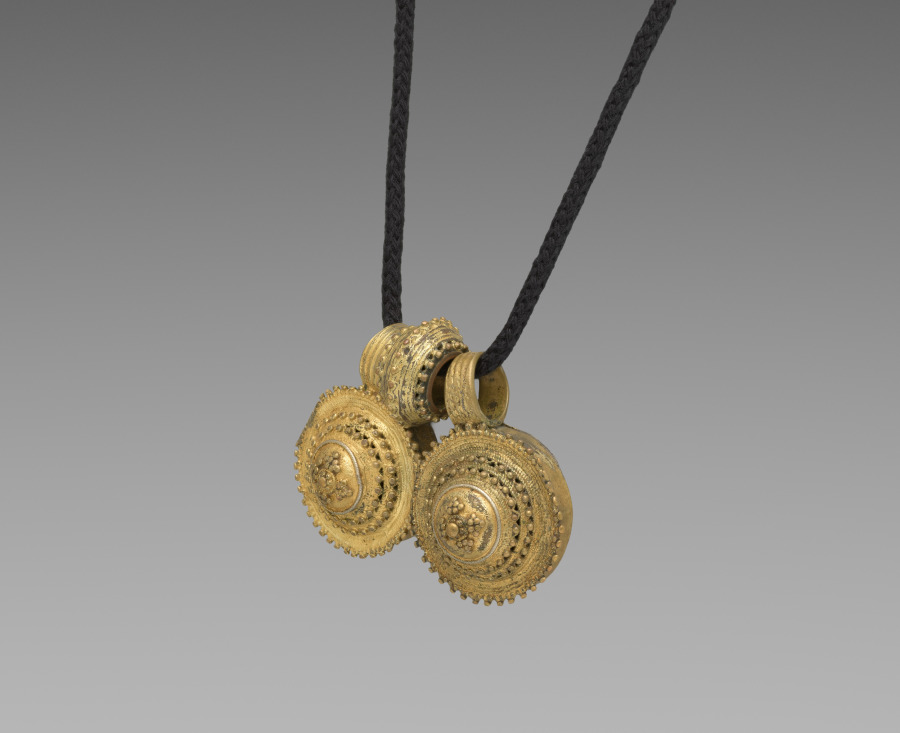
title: Necklace (ashän ketab) with amulet pendants (tälsäm) and bead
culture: Africa, East Africa, Ethiopia, unknown silversmith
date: late 1800s or early 1900s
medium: mercury-gilded copper alloy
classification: Jewelry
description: Ornate filigree jewelry was historically made in Ethiopia for royals and nobility by specialized silversmiths trained through long apprenticeships. This gold-washed silver necklace is composed of numerous box-shaped amulet pendants (tälsäm) meant to ward off the evil eye or other dangers. Linked to Islamic amuletic practices, the boxes are effective whether empty or whether they contain magical or prayerful texts. Their fine filigree and granulation work is characteristic of Harar as well as the Ethiopian Orthodox Christian city of Aksum.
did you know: Gold and silver jewelry has been made in Ethiopia for at least 2000 years.